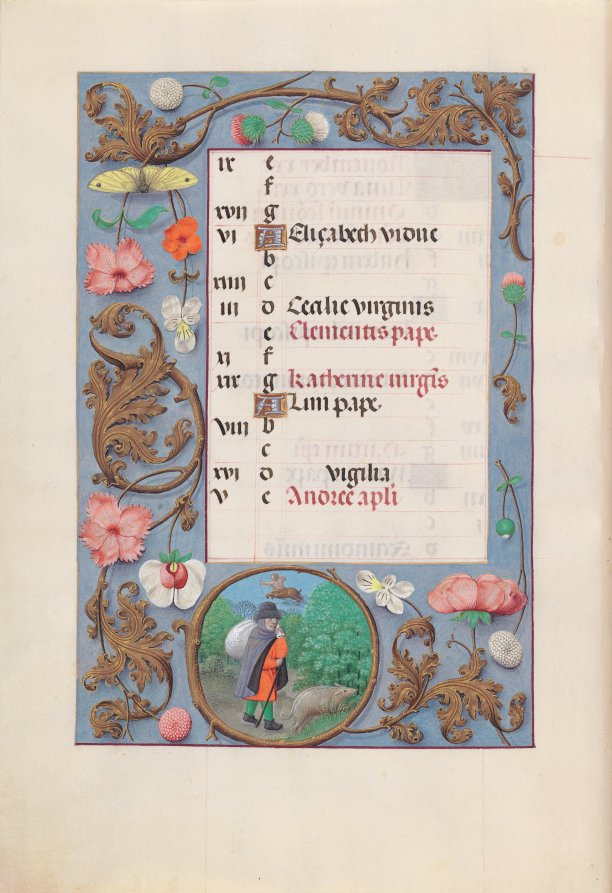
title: Hours of Queen Isabella the Catholic, Queen of Spain: Fol. 12v, November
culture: Flanders, Ghent and Bruges, late 15th century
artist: Master of the First Prayerbook of Maximillian (Flemish, c. 1444–1519)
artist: and Associates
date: c. 1500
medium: ink, tempera, and gold on vellum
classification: Bound Volume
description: This manuscript was illuminated by a circle of at least five highly organized manuscript painters active in the Flemish cities of Ghent and Bruges. The principal illuminator was Alexander Bening, who painted the majority of the book's miniatures. Manuscripts produced by this circle of artists are renowned for the decoration of their borders, which typically feature a rich variety of realistically-painted flowers, birds, and butterflies. This prayer book, called a book of hours, was intended not for a cleric, but for the private devotions of a lay person-in this case, Isabella the Catholic, Queen of Spain (1451-1504). Isabella's coat of arms embellishes the book's frontispiece. It is unlikely that the book was commissioned by the Queen herself; rather, she probably received it as a diplomatic gift from someone courting her patronage, perhaps Cardinal Francisco Jimenez de Cisneros. A Franciscan friar, Jimenez was dependent upon Isabella for his advancement, first to the post of Queen's confessor in 1492, and then to Archbishop of Toledo in 1495.